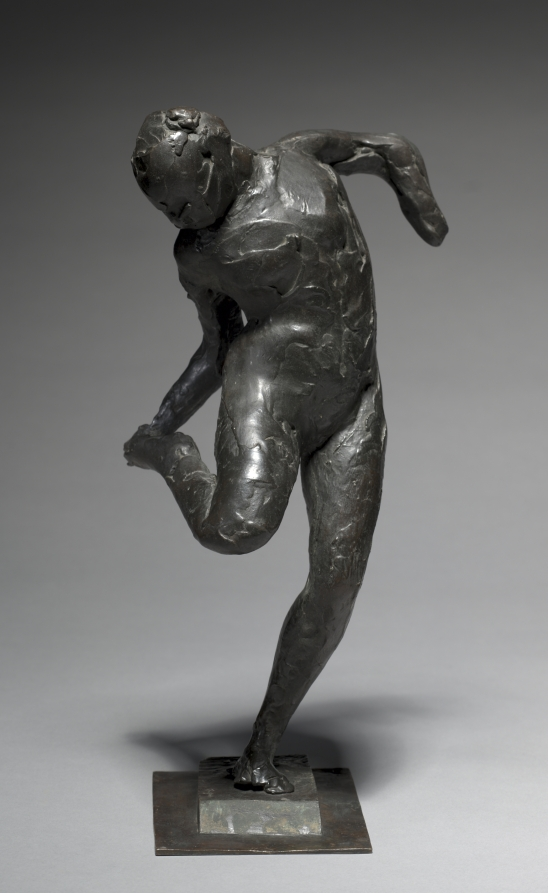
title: Dancer Looking at the Sole of her Right Foot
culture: France, 19th century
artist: Edgar Degas (French, 1834–1917)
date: 1896–97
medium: bronze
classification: Sculpture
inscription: Signed on base at left: Degas. Inscribed behind right foot: 67/B.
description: Degas produced numerous wax sculptures during his lifetime that were cast in bronze shortly after his death. This late work continues his fascination with dancers and the physical sensation of the human body in motion. Marks made by artist's fingers are visible in the bronze surface.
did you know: Degas often frequented the Garnier opera house in Paris to observe the dancers during both onstage performances and backstage rehearsals. Paying careful attention to their movements and poses, he produced nearly 1,500 works depicting ballet dancers, including paintings, drawings, and sculptures.